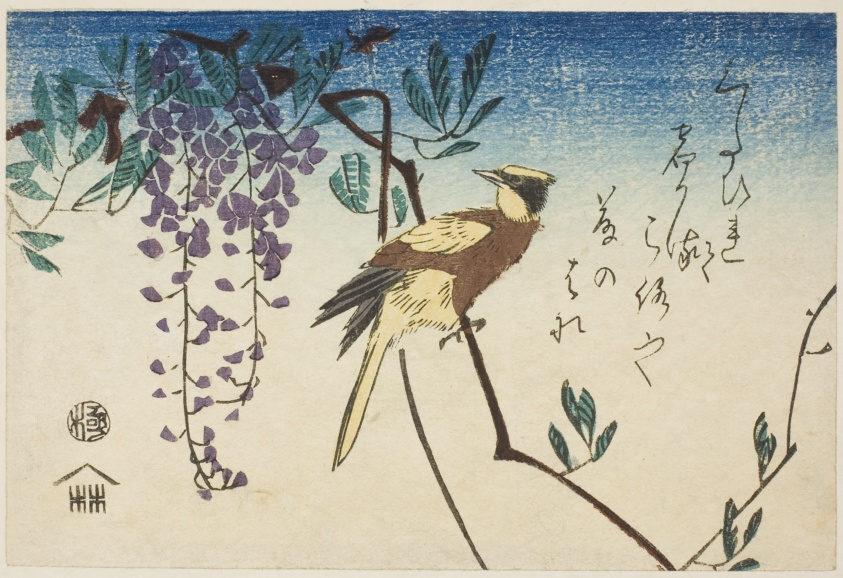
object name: Print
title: Black-naped oriole and wisteria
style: Japanese (culture or style)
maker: Utagawa Hiroshige 歌川 広重; Japanese, 1797-1858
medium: Color woodblock print; yotsugiriban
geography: Japan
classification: woodblock print; print; asian art